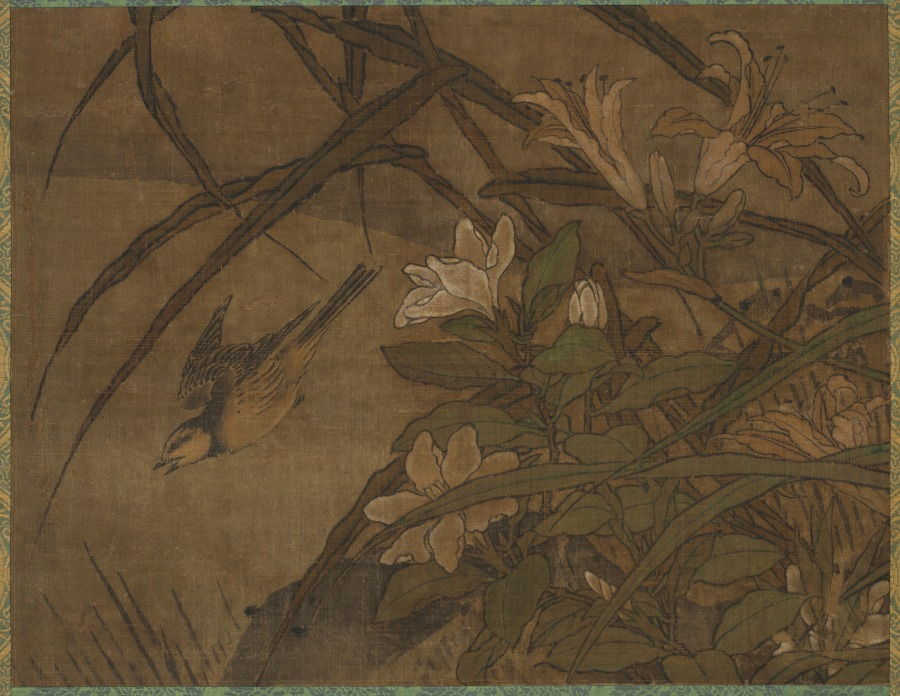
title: Birds and Flowers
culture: Japan, Muromachi period (1392–1573)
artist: attributed to Sesshū Tōyō (Japanese, 1420–1506)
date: mid-1400s-early 1500s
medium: Two hanging scrolls from a triptych; ink and color on silk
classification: Painting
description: These two paintings are possibly by Sesshū Tōyō. They once flanked a central scroll with an ink landscape. The unbalanced nature of the compositions, however, suggests they may be images recycled from larger paintings. The one with sweet osmanthus and hibiscus is an autumn scene, the other is a summer scene with daylilies and gardenias. Folding screens often contrast two seasons or depict all four across a single pair of screens. Sesshū’s works were sufficiently prized that repurposing them in fragmentary form to display in an alcove of a luxurious room would not be an unusual choice.